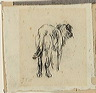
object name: Drawing and Watercolor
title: Study of a Dog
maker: Jean François Millet (French, 1814-1875)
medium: Black chalk on ivory wove paper, discolored to cream, laid down on cream wove paper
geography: France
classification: drawings (visual works); prints and drawing